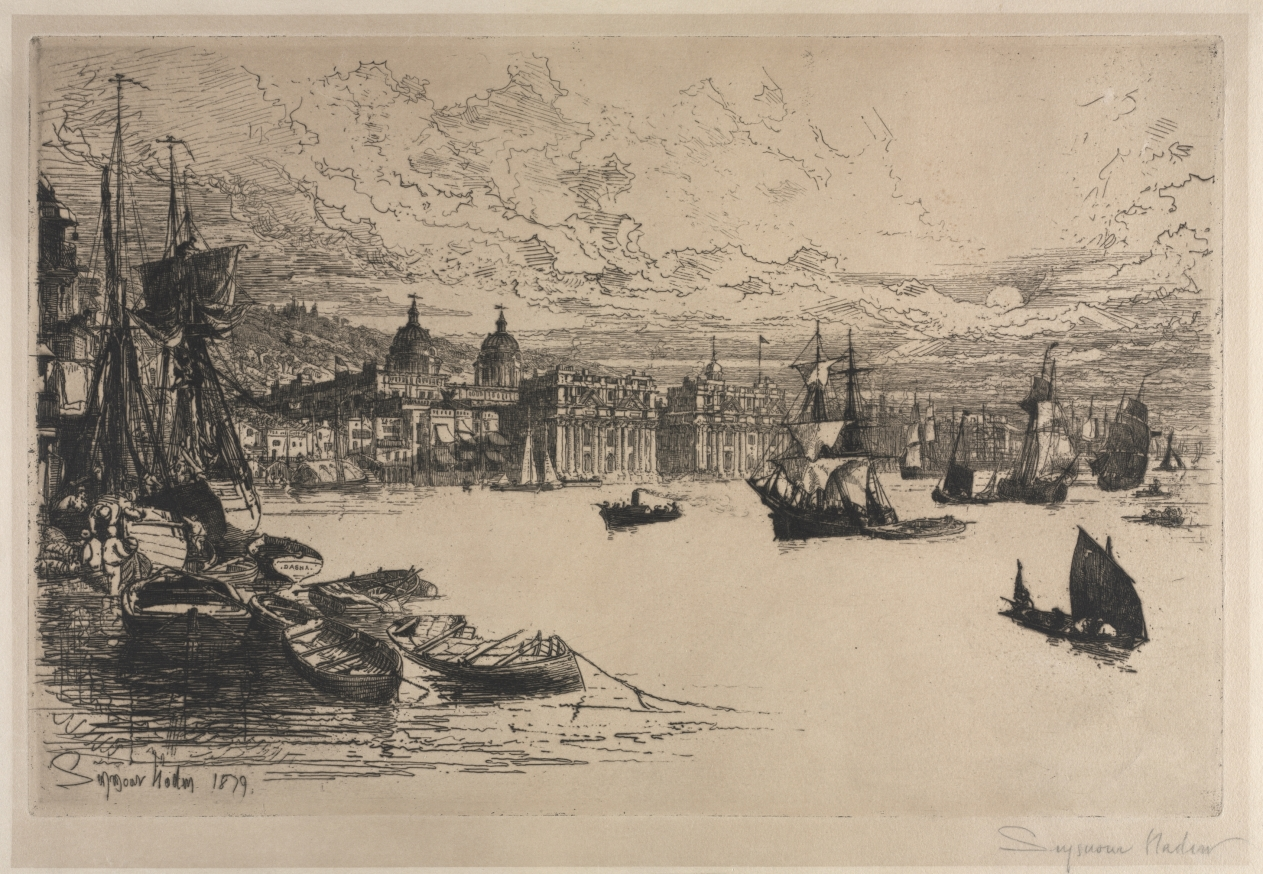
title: Greenwich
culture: England, 19th century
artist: Francis Seymour Haden (British, 1818–1910)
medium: etching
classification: Print